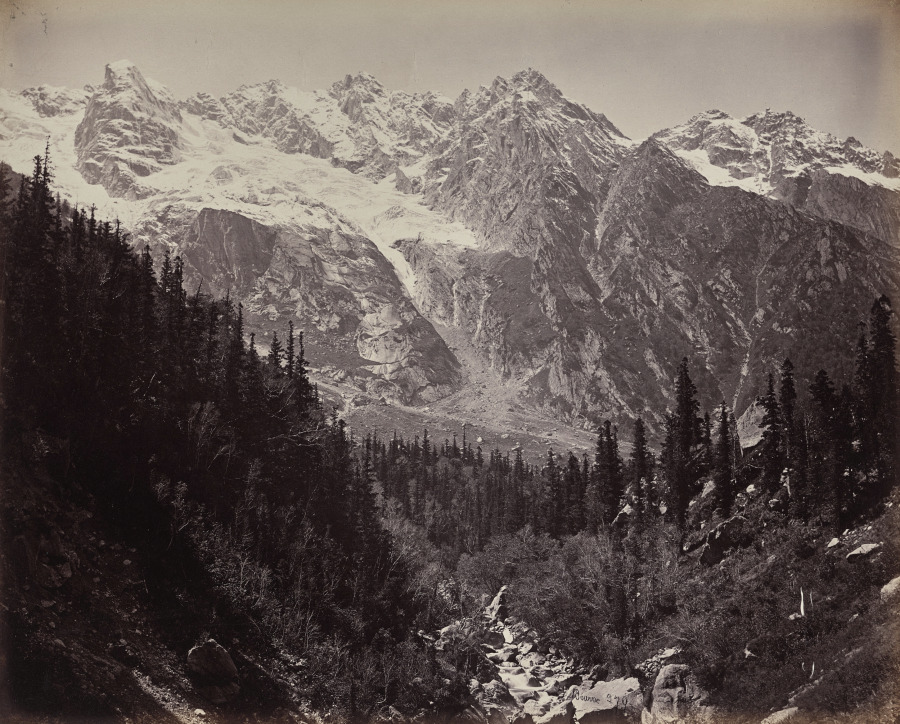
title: Scene in the Upper Himmalayahs. View in the Manga Valley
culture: England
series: Photographs of Northern India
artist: Samuel Bourne (British, 1834–1912)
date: 1863–70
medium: albumen print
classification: Photograph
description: The 50 images in this album, all taken in the 1860s, move from the hill towns of the Himalayas down to cities including Lahore (now in Pakistan), Delhi, Lucknow, Agra, Benares (now Varansi), and Calcutta (now Kolkata). Architectural studies of major monuments offer valuable historical records of what sites such as the Taj Mahal and the imperial mosque of the Mughal emperors in Delhi looked like before twentieth-century restorations.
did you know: Samuel Bourne, the author of most the images in this album, was a banker in England before he moved to India to become a professional photographer.